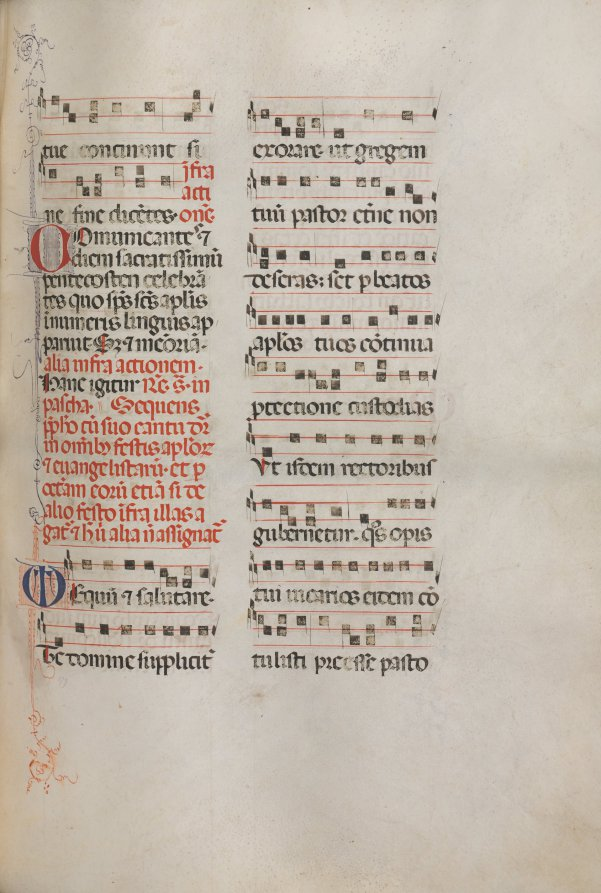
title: Missale: Fol. 181: Music for various ordinary prayers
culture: Italy, Perugia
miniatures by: Bartolommeo Caporali (Italian, c. 1420–1503)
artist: assisted by Giapeco Caporali (Italian, d. 1478)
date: 1469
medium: ink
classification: Bound Volume